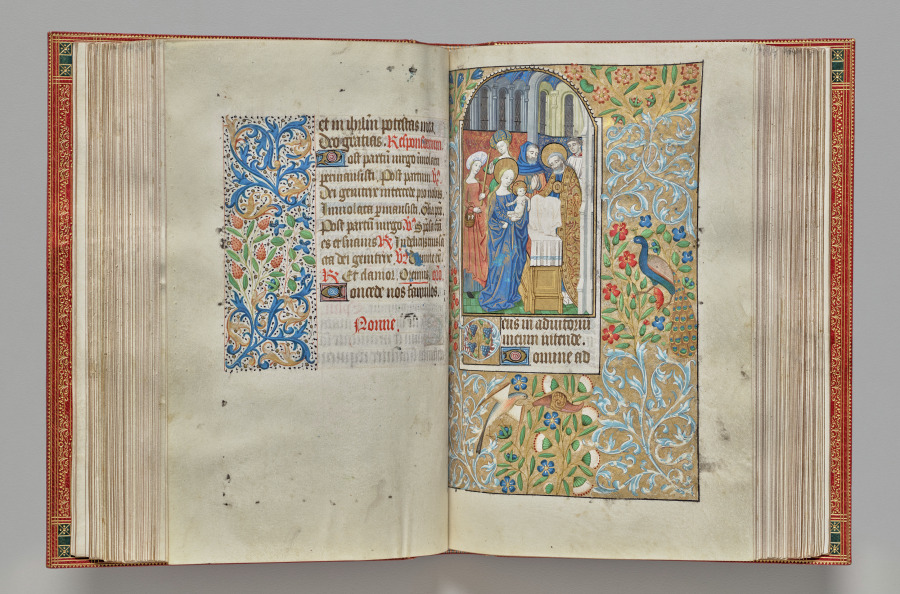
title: Book of Hours (Use of Rouen): fol. 67r, Opening of None, Presentation of the Christ Child in the Temple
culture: France, Rouen, 15th century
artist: Master of the Geneva Latini (French, active Rouen, 1460–80)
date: c. 1470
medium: ink, tempera, and gold on vellum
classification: Bound Volume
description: In the late 1400s and early 1500s Rouen was an established and important center of book production. The city’s cathedral had a wealthy chapter that spent large sums of money to commission books and to maintain its extensive library. The stationers and booksellers would have likely been concentrated in or near the cathedral precinct. This artist, named after a manuscript now in Geneva, was Rouen’s principal illuminator during the second half of the 1400s.